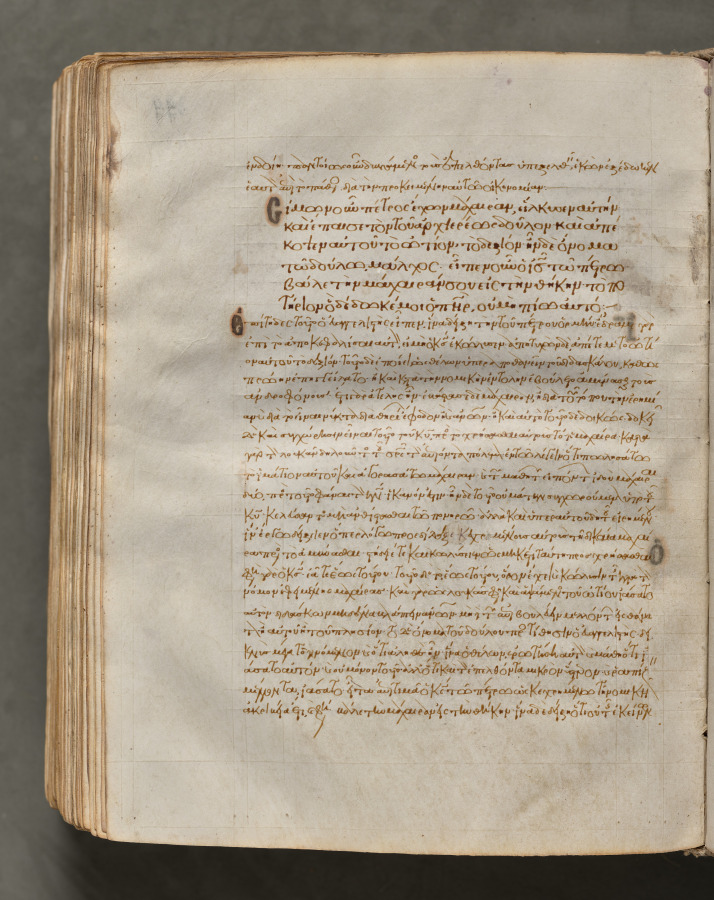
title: Text, folio 407 (verso), from a Gospel Book with Commentaries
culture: Byzantium, Constantinople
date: c. 1000–1100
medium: ink, tempera, and gold on vellum; leather binding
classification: Bound Volume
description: Each of the four gospels in this book opens on a page with brilliantly illuminated borders depicting the author of the text as well as birds—principally peacocks, symbols of the immortality of the soul—and fountains, representing the fountain of life and the salvation of the soul. This volume consists of 428 leaves with texts in Greek. Its level of sophistication suggests that it was probably written and decorated in a monastery in Constantinople.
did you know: Gospel books were carried in procession through Byzantine churches.